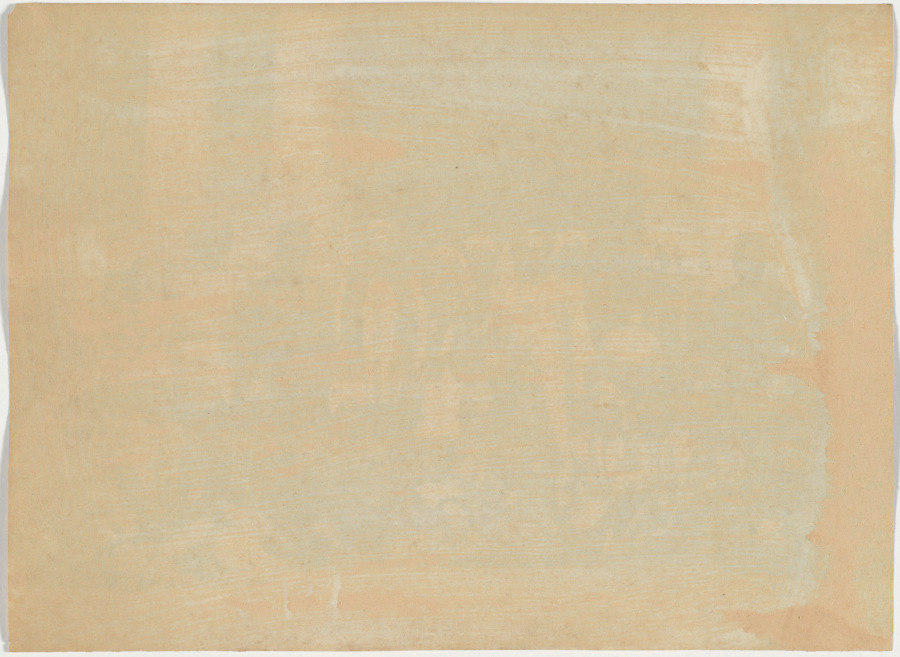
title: Maharaja of Rewa and Sardars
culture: India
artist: Raja Deen Dayal (Indian, 1844–1905)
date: 1886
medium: albumen print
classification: Photograph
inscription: No visible inscriptions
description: Deen Dayal uses the arrangement of people and the architecture to point to the most important person in the photograph. Here, the Maharaja of Rewa is placed front and center. “Sardars,” inscribed on the top picture’s mount, refers to the military officials surrounding him. After 1858, British influence dictated that Indian rulers be educated in European history and ideas as well as their local culture and history. In the bottom image, the young maharaja is shown with Indian teachers, but the instructional tools are Western: bound books and a raised relief globe (with Asia visible).